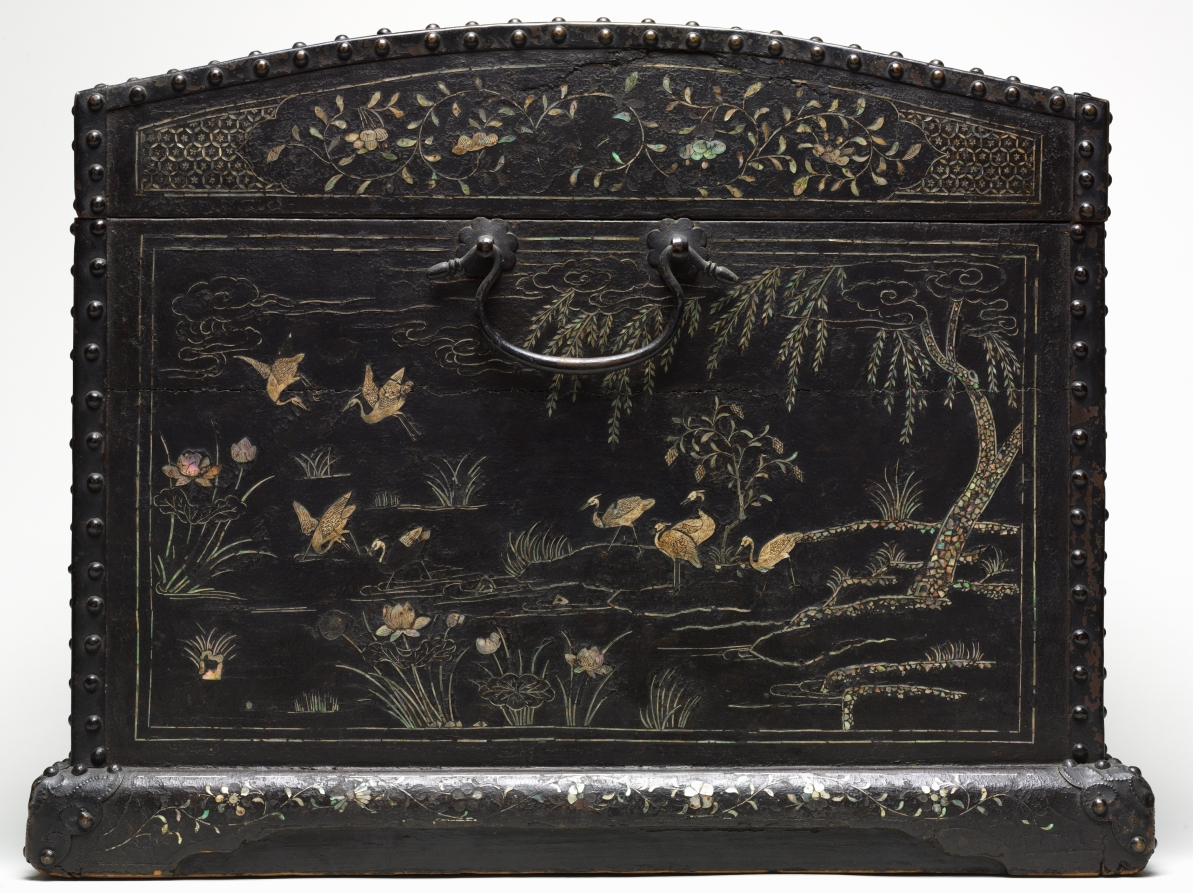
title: Chest for Storing Garments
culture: China, Ming dynasty (1368–1644)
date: 1400s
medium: lacquered wood with mother-of-pearl inlay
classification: Lacquer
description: This precious lacquer box is decorated with bird and plant motifs and figures in mother-of-pearl inlay. The decoration depicts the leisurely pursuit of scholars in nature and a garden setting. Scholars play the board game weiqi, have philosophical conversations, pluck a qin (a zither-like instrument with strings), and read books. Lacquer chests of this type were used to store garments neatly folded along their straight seams. The mother-of-pearl inlay from shells is a technique that was typically practiced by craftsmen in Hangzhou and other parts of southeast China near the sea.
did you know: Lacquer chests of this type were used to store garments.